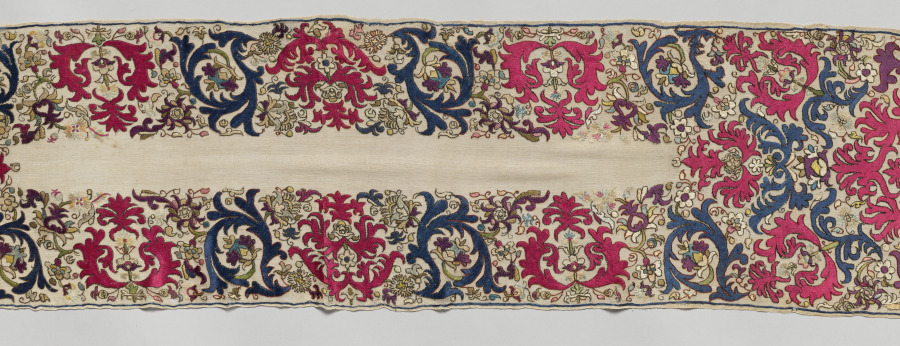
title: Headkerchief (tensifa)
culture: Africa, North Africa, Algeria, Algerian embroiderer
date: 1700s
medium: Linen, silk, gold, silver, dye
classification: Embroidery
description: This beautiful kerchief, worn wrapped around the head, was part of elegant bathing equipment that well-to-do women wore while relaxing in a hammam after bathing. The floral and foliate embroidery reflect a fashion that lasted for more than a century. This example is dominated by brilliant crimson and blue silk stitches.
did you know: This textile was displayed in the CMA’s first exhibition in 1916. While it is from North Africa, it was displayed in the "Nearer East" gallery.